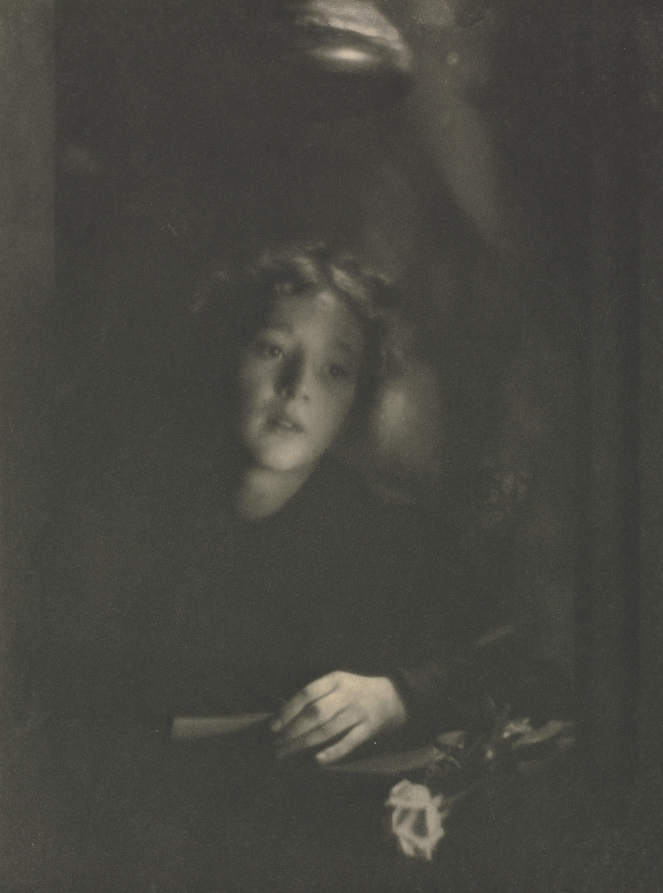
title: Camera Work: Girl with Rose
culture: America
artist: Clarence H. White (American, 1871–1925)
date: 1908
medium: photogravure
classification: Bound Volume